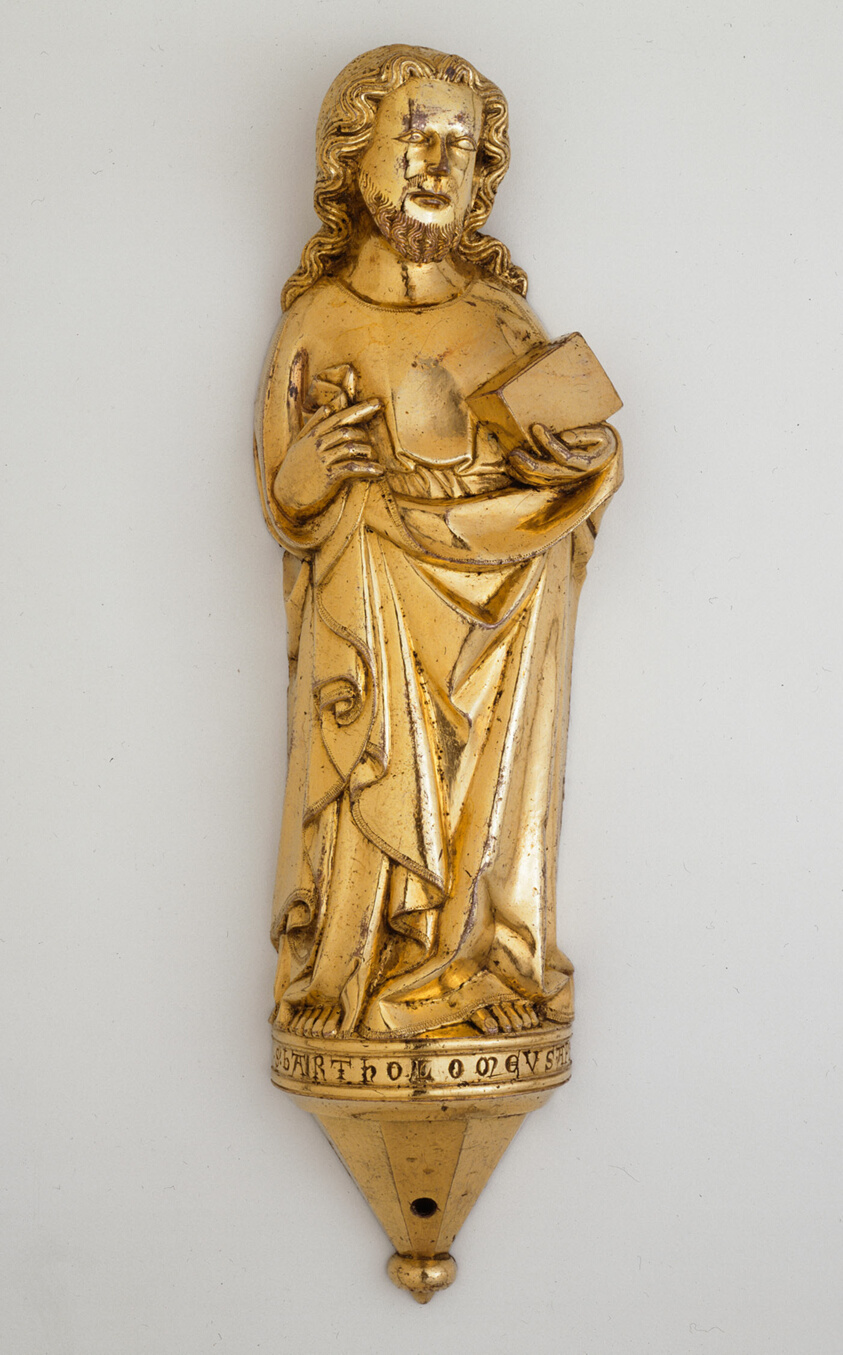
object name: Sculpture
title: Saint Bartholomew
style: medieval, 14th century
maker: Northwest German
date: 1340/50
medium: Gilt bronze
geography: Germany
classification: statuette; sculpture; figure; bronze; german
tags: saints, Christian subjects, Christianity, figure, man, religion, religious, religious figures